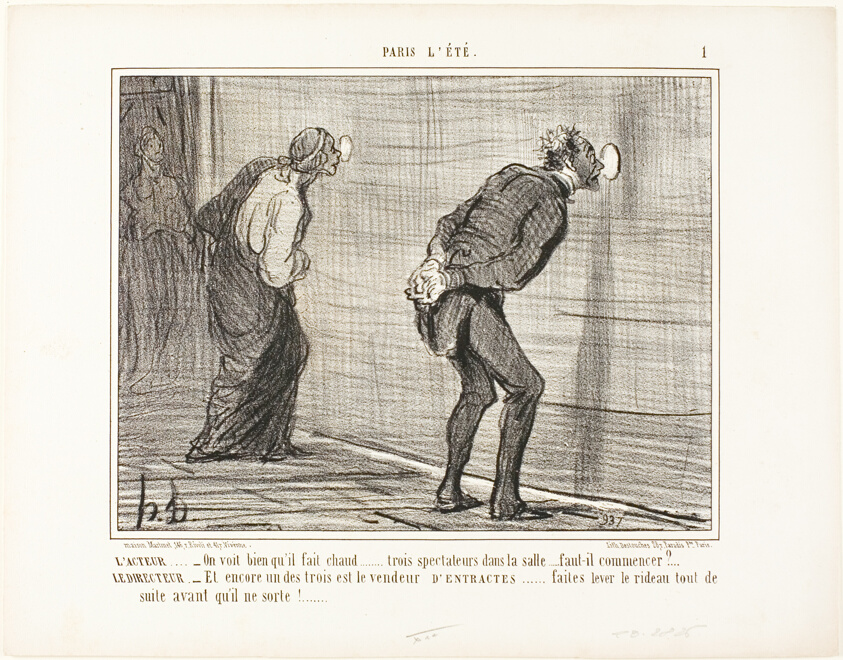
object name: Print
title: The Actor: “- It's obvious that it is hot out there... only three spectators in the audience... should we really start?” The Director: “- And one of them is the refreshments vendor ... quickly raise the curtain before he has a chance to leave,” plate 1 from Paris L'été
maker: Honoré Victorin Daumier; French, 1808-1879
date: 1856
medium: Lithograph in black on ivory wove paper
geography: France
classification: lithograph; print; prints and drawing